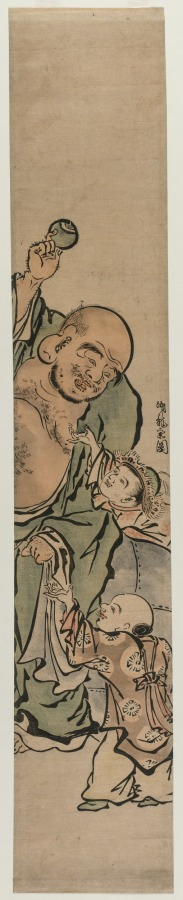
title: Two Children Begging Hotei for a Jewel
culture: Japan, Edo period (1615–1868)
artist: Isoda Koryūsai (Japanese, 1735–1790)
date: c. 1770s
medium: color woodblock print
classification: Print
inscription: Signature: Koryusai zu